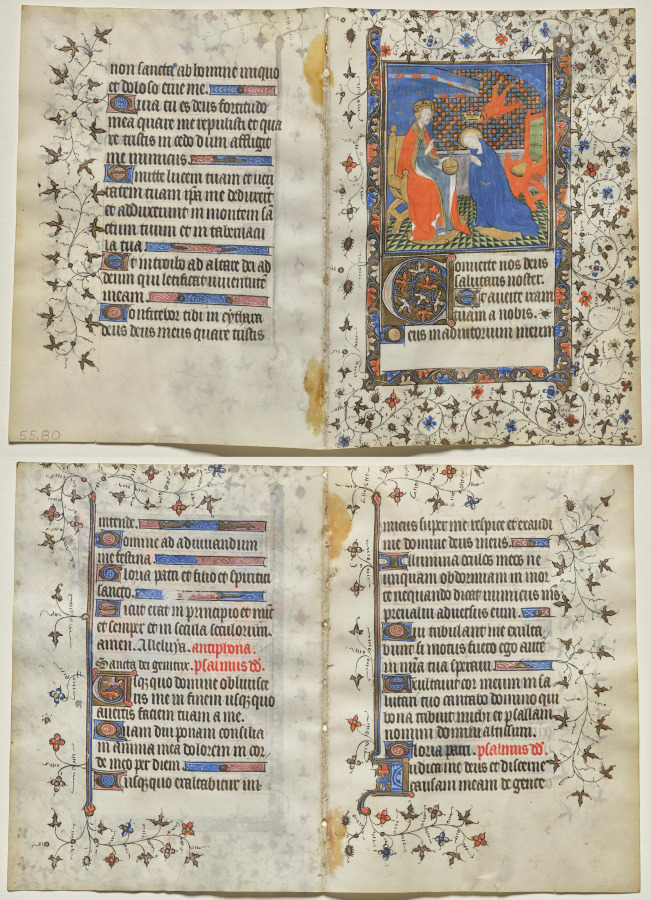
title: Bifolio from a Book of Hours: Coronation of the Virgin (recto); Text (verso)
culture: France, Paris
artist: workshop of Boucicaut Master (French, Paris, active about 1410–25)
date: c. 1415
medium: ink, tempera, and gold on vellum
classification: Manuscript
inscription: Converte nos, Deus salutaris noster, et averte iram tuam a nobis Deus in adiutorium meum…[intende]